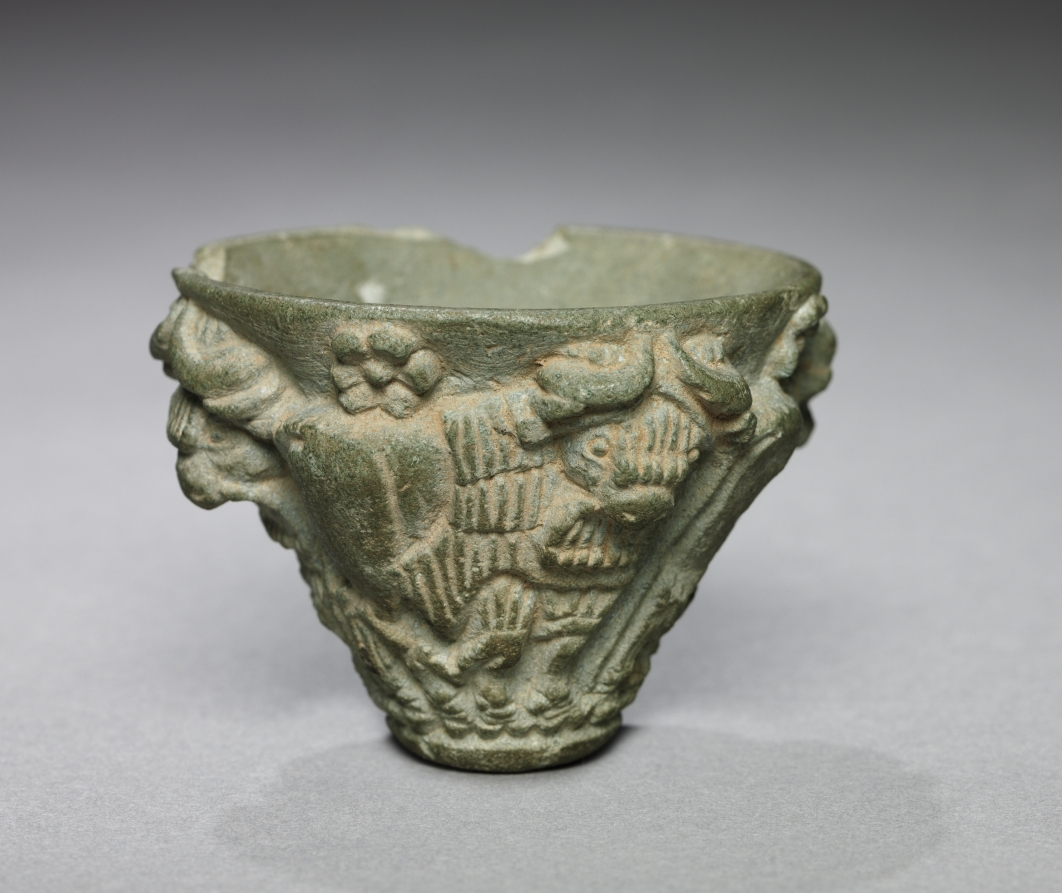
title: Bull Procession Cup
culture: Sumerian, Iraq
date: c. 3100–2900 BCE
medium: gray limestone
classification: Sculpture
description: It was believed that the person who drank from a cup like this magically gained the fertility of the bulls carved on its surface.